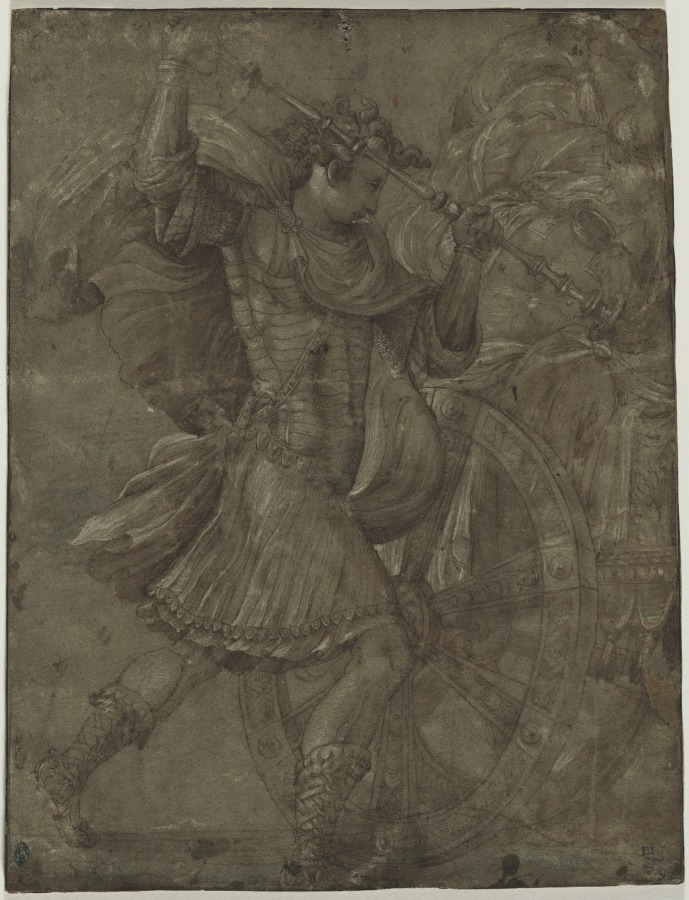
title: Man in Armor beside a Chariot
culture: Italy, 16th century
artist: assistant of Francesco Salviati (Italian, 1510–1563)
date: c. 1550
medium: pen and brown ink and brush and brown wash over black chalk, heightened with white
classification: Drawing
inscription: lower right, in graphite: [illegible] / Elève de Raphael [in parentheses] ; lower right, in graphite(?): [illegible] ; VERSO OF TERTIARY SUPPORT, upper left, in blue crayon: WCA 2302 ; center, in graphite: Maturino / Elève de Raphael [underlined, in parentheses) ; center right, in graphite: Ecole de Rome [in parentheses]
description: This drawing of a young soldier setting fire to a cart of war trophies may represent a rarely depicted legend about the Macedonian king Alexander the Great (356–323 BC), who built one of the largest empires of the ancient world by the time he was 30 years old. Because the heavy spoils of war were slowing down his troops, Alexander set fire to his own cart of goods to encourage his soldiers to do the same. Renaissance princes revered him as a brilliant military strategist. Emperor Maximilian I (reigned 1486–1519), pictured in the equestrian portrait and in the great triumphal car nearby, considered Alexander a distant ancestor.